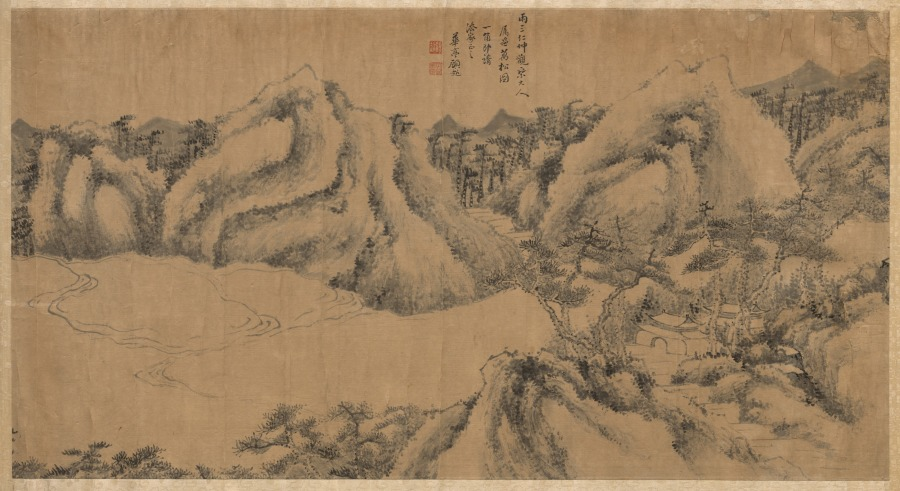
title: Pine-shaded Monastery on a Cloudy Mountain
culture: China, Qing dynasty (1644-1911)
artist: Gu Chao (Chinese, active late 1700s)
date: late 1700s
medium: handscroll, ink and slight color on paper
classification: Painting